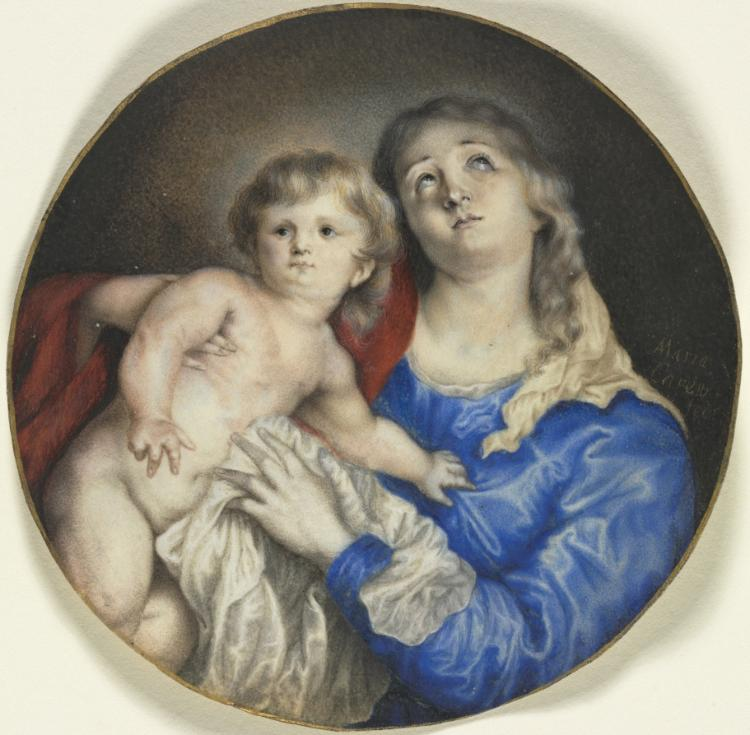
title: Virgin and Child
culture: England, 17th century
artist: Anna Maria Carew (British)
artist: after Anthony van Dyck (Flemish, 1599–1641)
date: c. 1662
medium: watercolor heightened with gum on vellum, with gold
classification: Portrait Miniature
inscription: signed at right center: "Maria Carew / fect"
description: Larger in size than most portrait miniatures, the Madonna and Child by Anna Maria Carew is a cabinet miniature, or a small work on vellum, enamel, or ivory that copies a full-scale oil painting. In this case the original painting was by Flemish artist Anthony van Dyck, and engraved by Paulus Pontius around 1630 shortly after it was painted. As a cabinet miniature, this work is somewhat unusual because of its religious subject and its simplicity. Cabinet miniatures tended instead to reproduce paintings of dramatic subjects and climactic moments in myths or religious stories. They could be hung on the wall or stored in elaborate and specially designed furniture, and they were often displayed in the smaller, more private rooms of a house.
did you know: King Charles II awarded Carew an annual pension to copy in miniature from the royal collection.